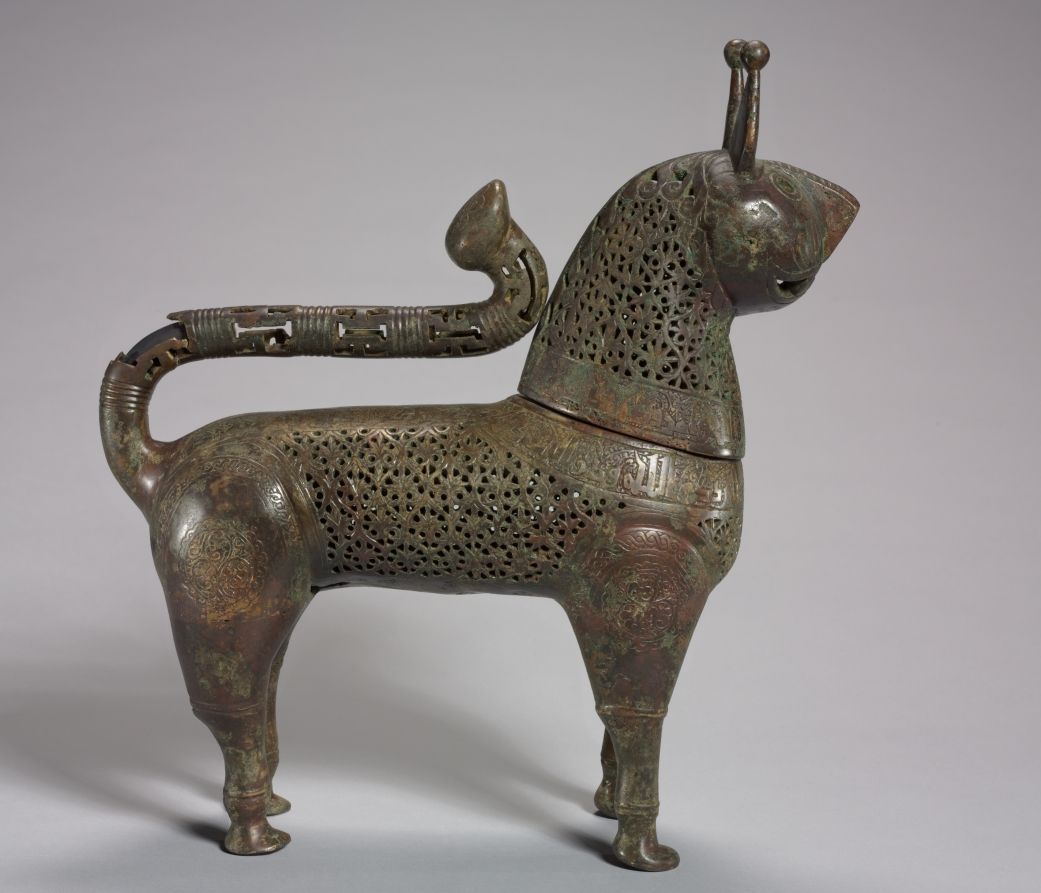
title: Feline Incense Burner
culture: Iran, Khurasan, Seljuq period of Iran (1037–1194)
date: 1150–1200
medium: Copper alloy, cast, engraved, chased, and pierced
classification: Metalwork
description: In Iran during the 1000s and 1100s, vessels in the shape of animals gained popularity, especially as incense burners. Felines were favored in Persian art and this piece may represent a caracal, a type of lynx. The head of the creature was cast separately and is removable to fill its body with hot coals and incense. Qur’anic verses on the neck and spine remind worshippers to set work aside, attend prayer, and then disperse to seek God’s bounty. The diffusion of perfumed smoke through the burner’s pierced palmette design may have served as a sensorial reminder of this teaching.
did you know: Arabic inscriptions in Kufic script against a background of scrolling arabesques run along the back and neck of the feline form.